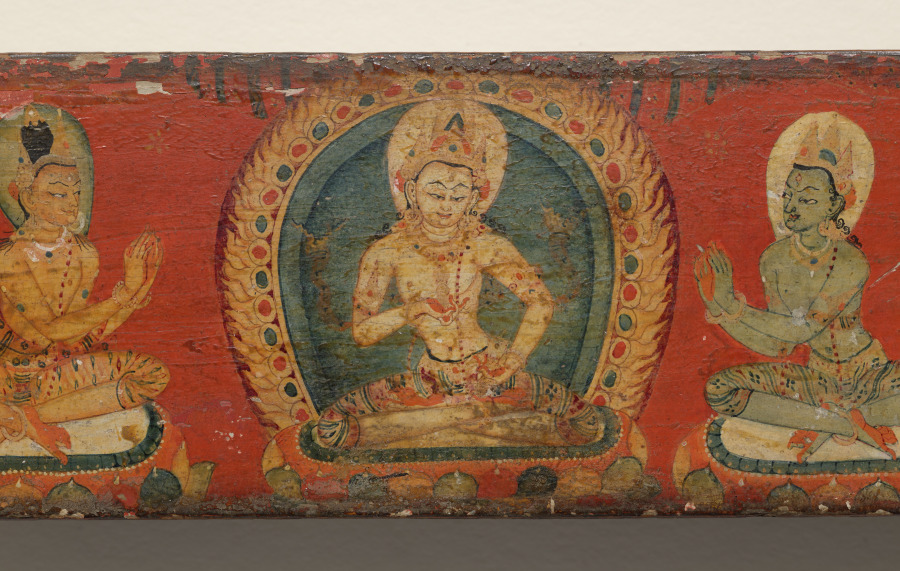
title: Four bodhisattvas and two attendants flanking Vajrasattva, bottom cover, from a Manuscript of the Perfection of Wisdom in Eight Thousand Lines (Ashtasahasrika Prajnaparamita-sutra)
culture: Eastern India, Bihar, Vikramashila Monastery. Painting: Nepal, Kathmandu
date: Sunday, September 14, 1119 (year 239 of the Newar Samvat in the month of Ashvina)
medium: Gum tempera, paper, and colors on wood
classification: Painting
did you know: The diamond pattern at the holes references the ribbons and cords that would have bound the book together.